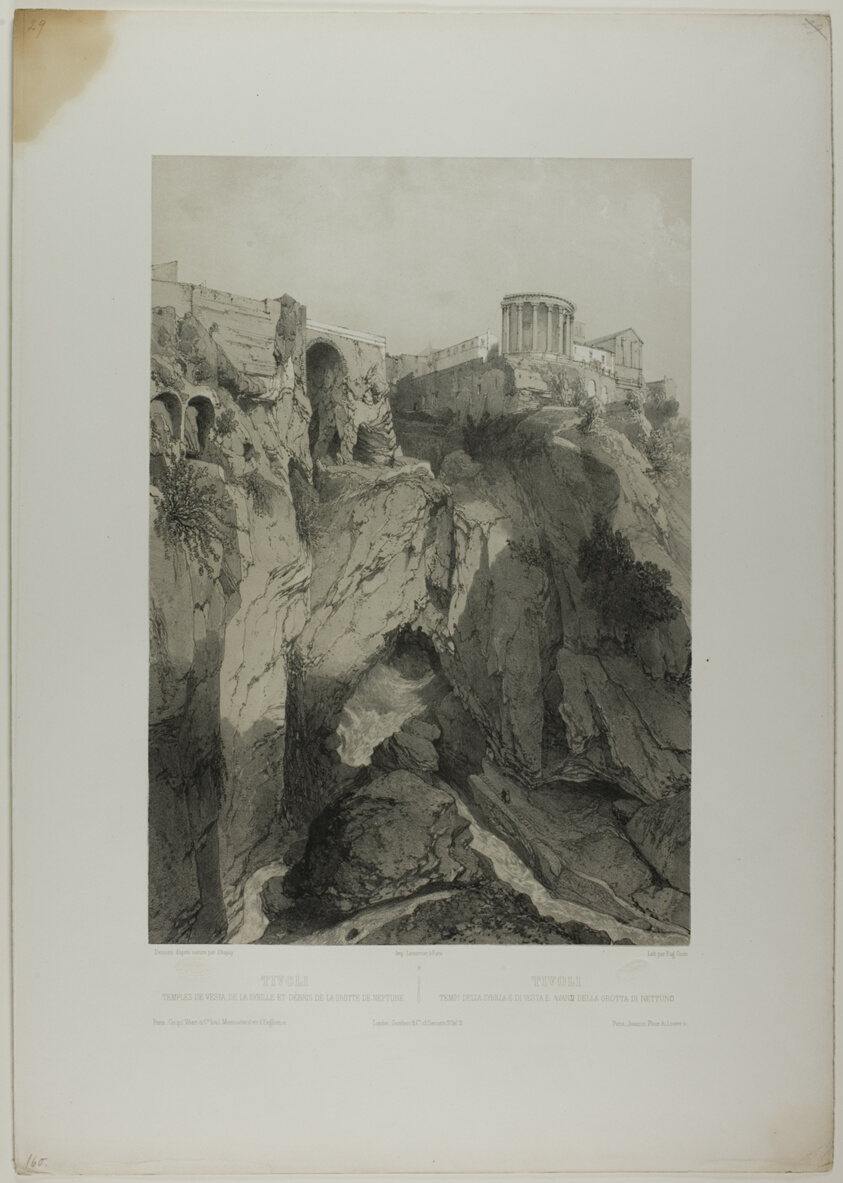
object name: Print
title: Tivoli: The Temples of Vesta and the Sibyl, and Ruins of the Grotto of Neptune, plate nineteen from Italie Monumentale et Pittoresque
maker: Eugène Cicéri (French, 1813-1890); after Nicolas Chapuy (French, 1790-1858)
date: c. 1848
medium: Lithograph from two stones on white wove paper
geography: France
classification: lithograph; print; prints and drawing